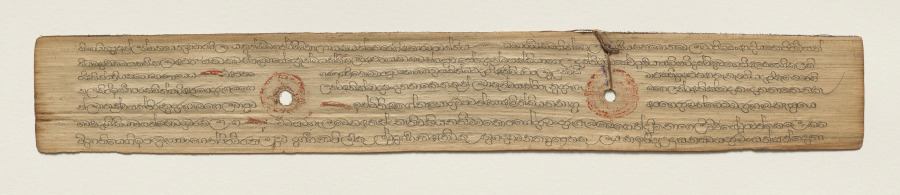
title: Leaf from a Buddhist Manuscript (verso)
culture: Sri Lanka, Singhalese, Late 17th century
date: c. 1700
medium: fiber paper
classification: Manuscript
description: Palm leaf material is still used for manuscripts in Sri Lanka. The palm leaves are prepared first by boiling them, drying them in the sun, and then rubbing them with oils. Scribes then use a metal stylus to incise the text. Then charcoal powder is wiped across the pages, filling in only the inscribed lines.